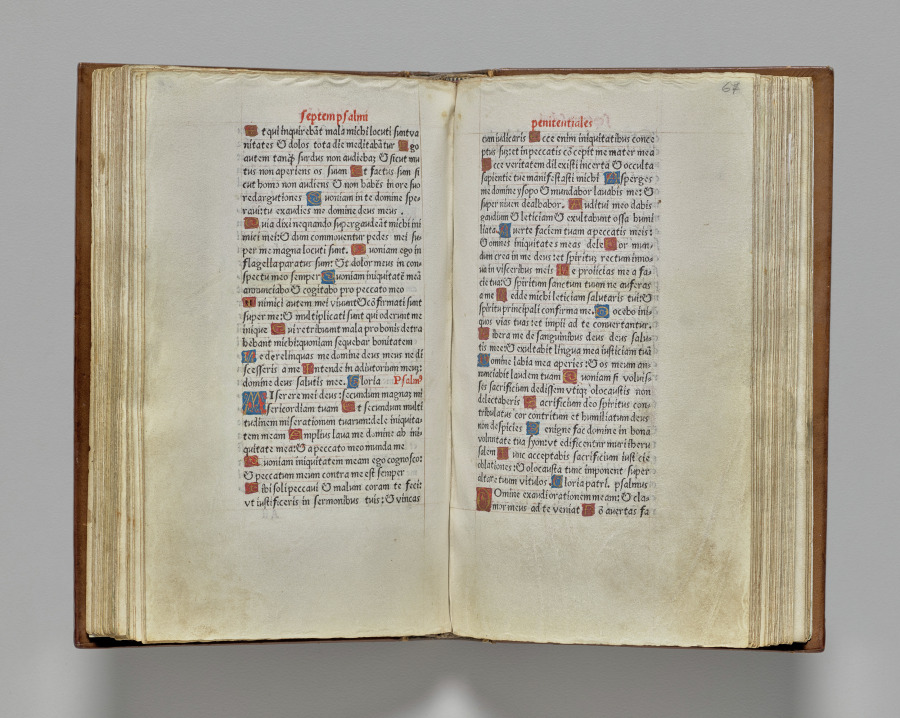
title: Printed Book of Hours (Use of Rome): fol. 66v, Text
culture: France, Paris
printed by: Guillaume Le Rouge (French, Paris, active 1493–1517)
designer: Master of the Très Petites Heures of Anne of Brittany (French, Paris, active c.1480–1510)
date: 1510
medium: 112 printed folios on parchment, bound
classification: Bound Volume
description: Illustrated prayer books called books of hours remained popular with Europe’s elite well into the era of printing technology. This example belongs to a printed edition of five by the Parisian printer and engraver Guillaume Le Rouge, dating to 1510. Though printed on vellum (not paper), its 62 engraved pictures were hand-colored by an illuminator much like a traditional manuscript. By the mid-1480s, Paris was the center of production for books of hours with printed texts and engraved ornament. This book is therefore a hybrid fusing two distinct production methods—illumination and printing—representing the waning phase of the illuminator’s art prior to the complete transformation to printed books.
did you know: The workshop of Guillaume le Rouge was in the Neuve Notre-Dame near Paris’s Notre Dame Cathedral.